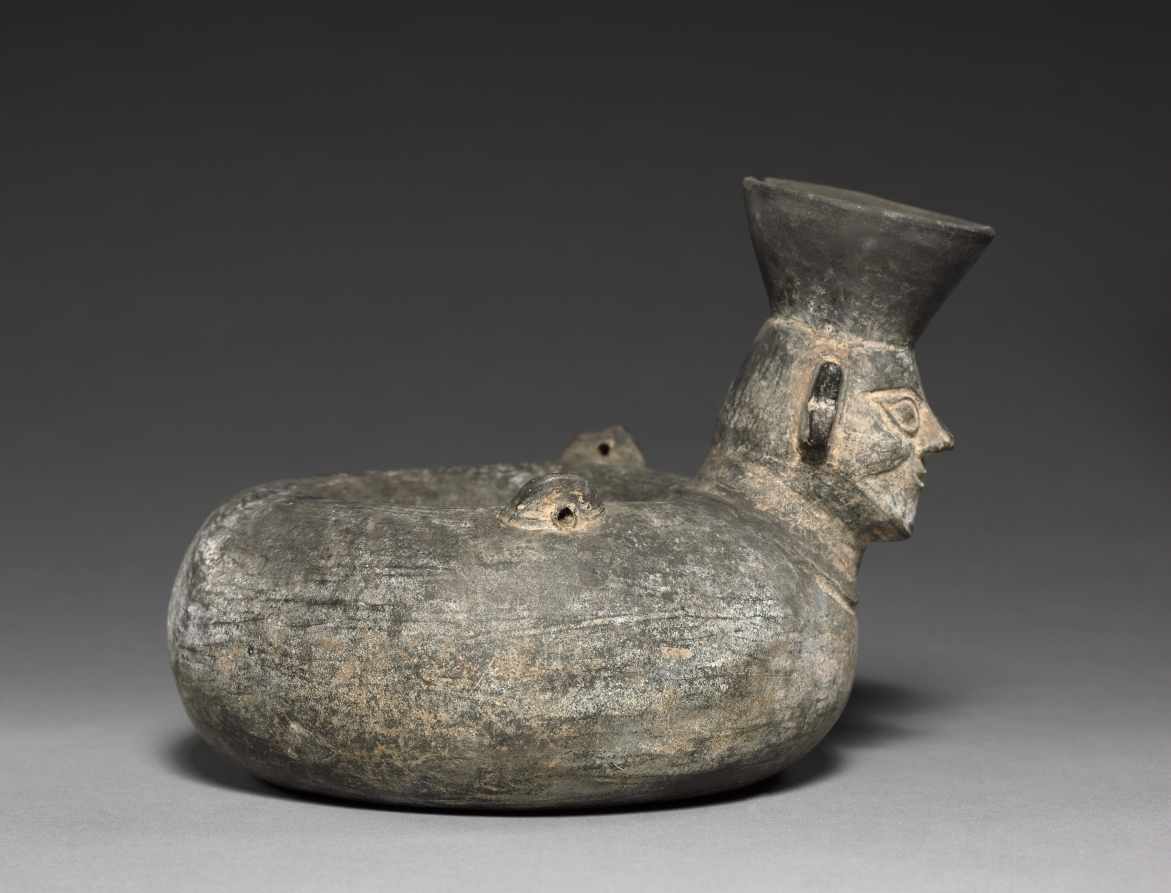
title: Funeral Urn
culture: Peru, Chimú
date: c. 1150–1530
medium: black ware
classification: Ceramic